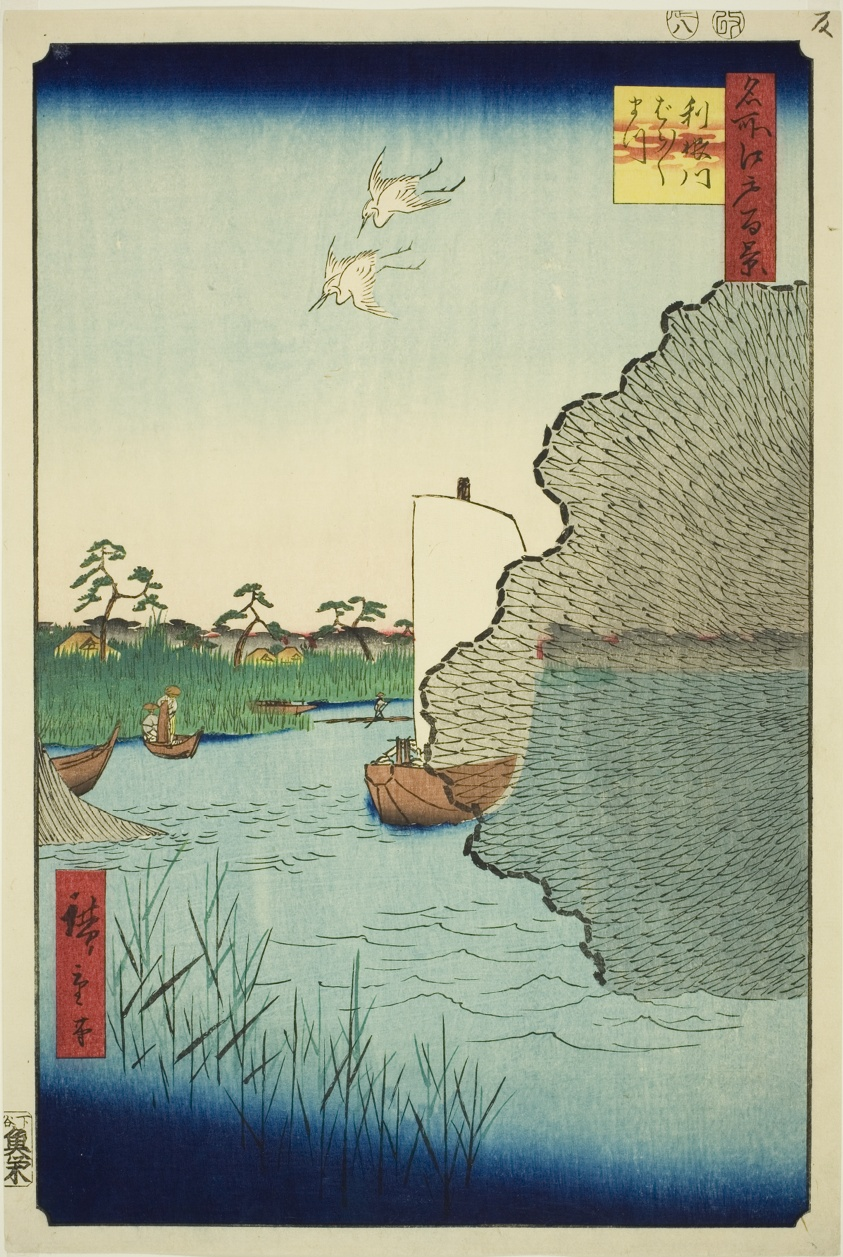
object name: Print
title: Scattered Pines on the Tone River (Tonegawa Barabara-matsu), from the series "One Hundred Famous Views of Edo (Meisho Edo hyakkei)"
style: Japanese (culture or style)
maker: Utagawa Hiroshige 歌川 広重; Japanese, 1797-1858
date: 1856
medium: Color woodblock print; oban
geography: Japan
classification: woodblock print; print; asian art